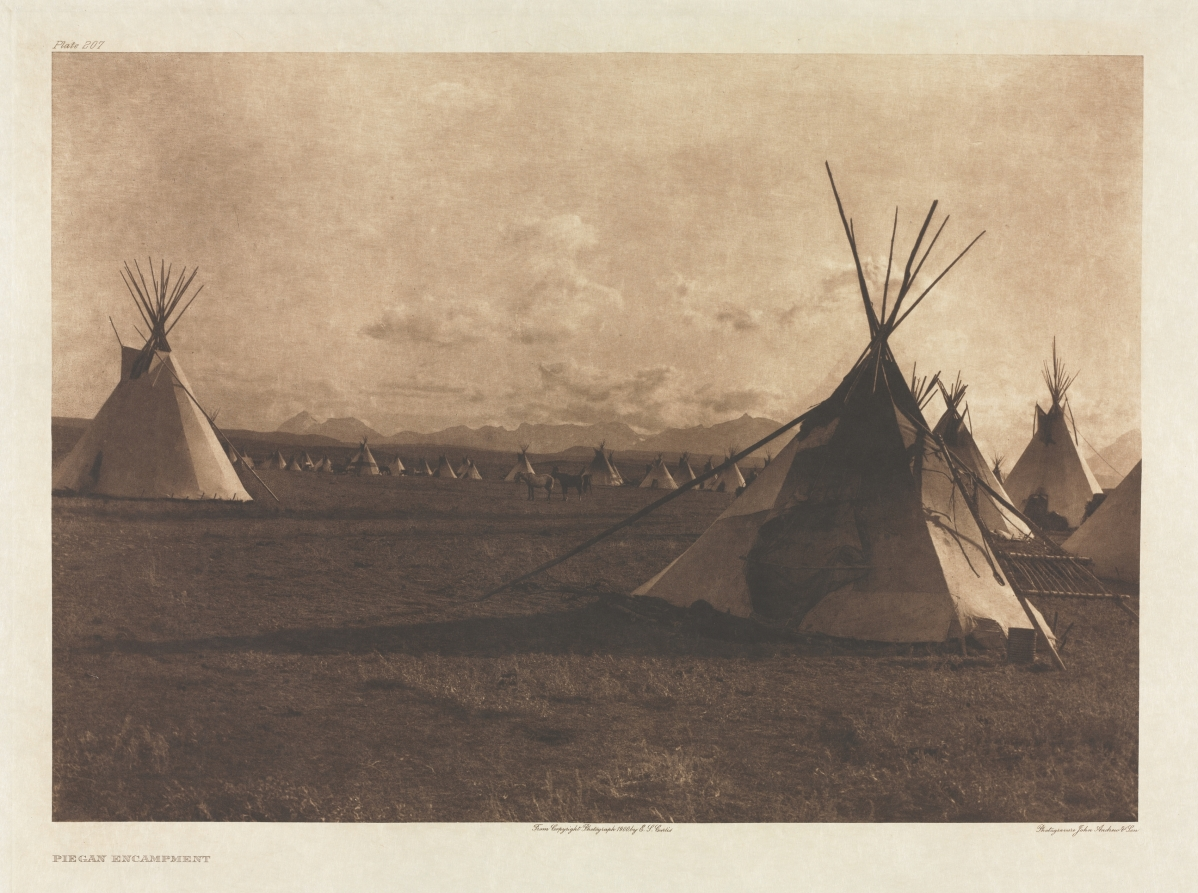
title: Portfolio VI, Plate 207: Piegan Encampment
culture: America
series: The North American Indian: being a series of Portfolios picturing and describing the Indians of the United States, the Dominion of Canada, and Alaska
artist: Edward S. Curtis (American, 1868–1952)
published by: The University Press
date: 1900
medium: photogravure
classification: Portfolio